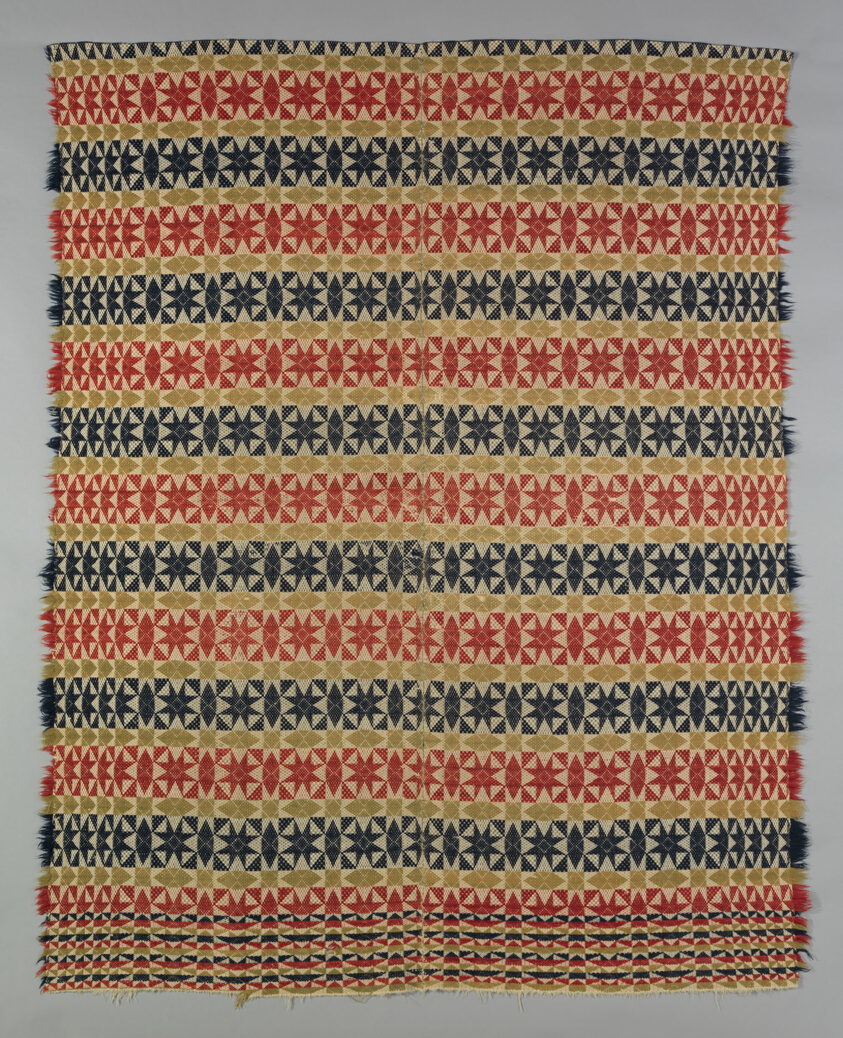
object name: Textile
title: Coverlet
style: American Fancy, Star work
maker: United States, Probably Pennsylvania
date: 1820-40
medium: Cotton and wool, plain weave with supplementary wefts in composite point twill weave (star work, multiple shaft); two loom widths joined; edged with extended supplementary weft fringe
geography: Pennsylvania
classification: weaving - coverlet; coverlet; weaving; textile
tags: coverlet, geometric motif, grids, diamond shapes, squares, stars, lines, star work